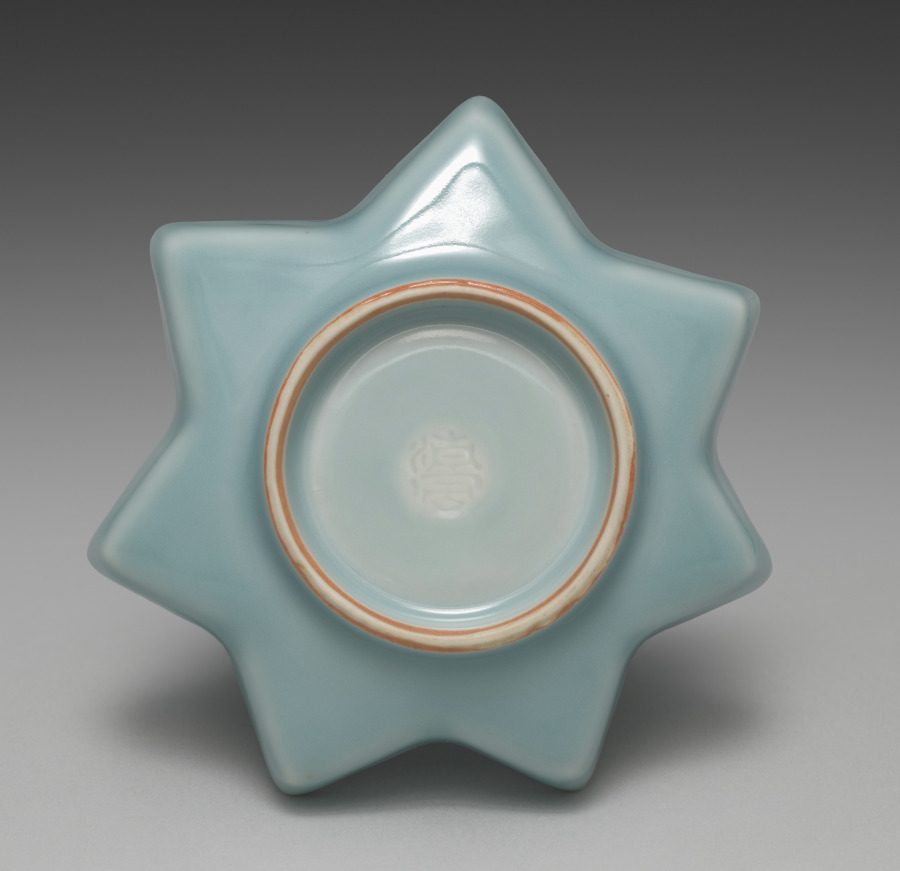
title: Saucer from Maple Leaf-Shaped Saucers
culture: Japan, Meiji period (1868–1912)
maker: Seifū Yohei III (Japanese, 1851–1914)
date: 1893–1914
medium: One of five dishes from a set of ten; porcelain with blue glaze and molded design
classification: Ceramic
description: These maple leaf–shaped saucers, like Yohei III's five shell saucers CMA 2022.188, have a long, horizontal box with a separate compartment for each piece. Now a set of five, these dishes were originally a set of ten, stored in two boxes of five each. From their housings, which accommodate differing numbers of objects, one can hypothesize that while some items created by the Seifu studio were intended to be acquired in larger sets, and thus were perhaps made to order, others, like these, may have been items to be purchased of the shelf in set quantities that allowed clients flexibility in scale. The box for these five saucers describes them as “heavenly blue[–glazed] porcelain” (tenseiji). The veins of the leaves are slightly raised in the clay so that the glaze pools around them and they stand out as white where the glaze thins. There are longer lines at the points of the leaves and shorter ones following the wall of each indentation so that the design has both a horizontal and a subtle vertical dimension.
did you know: These saucers shaped like maple leaves show Seifū Yohei III’s “heavenly blue glaze.”